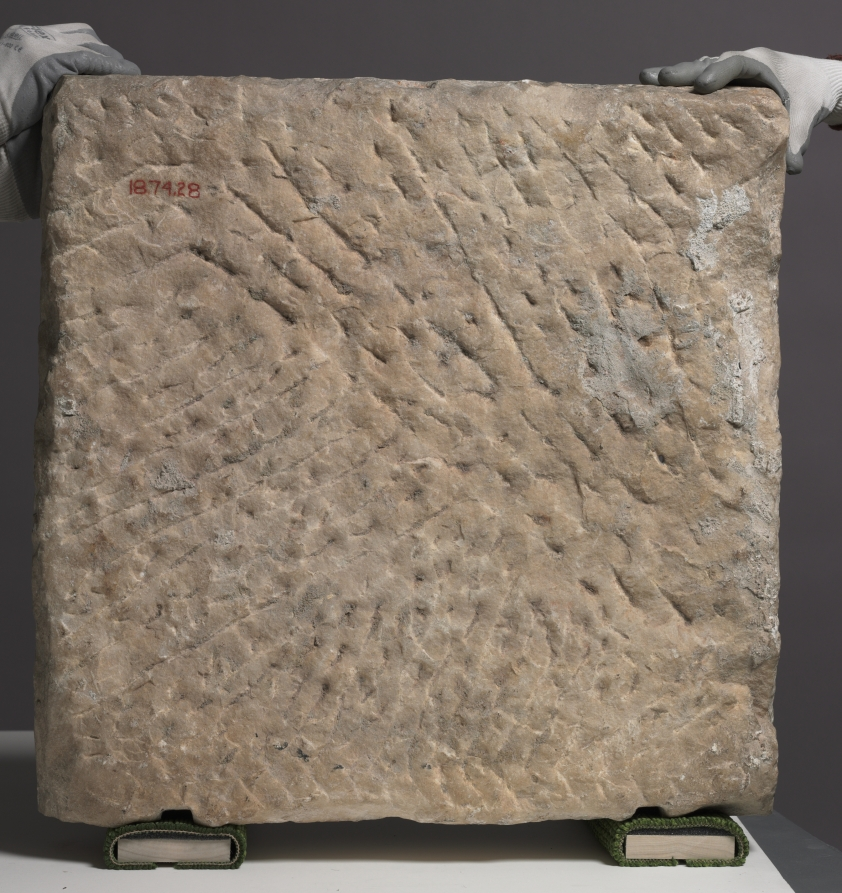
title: Pier Francesco Visconti, Court of Saliceto, Adoring the Christ Child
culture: Italy, Milan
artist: workshop of Benedetto Briosco (Italian, c. 1460–after 1514)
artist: and Tomaso Cazzaniga (Italian)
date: shortly after 1484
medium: marble with gilding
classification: Sculpture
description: This relief formed part of a public funerary monument in the church of Santa Maria del Carmine in Milan. The military leader and diplomat humbly kneels in profile before the infant Christ in a naturalistic setting, drawing attention to the Holy Family’s humanity and the deceased man’s reverence.